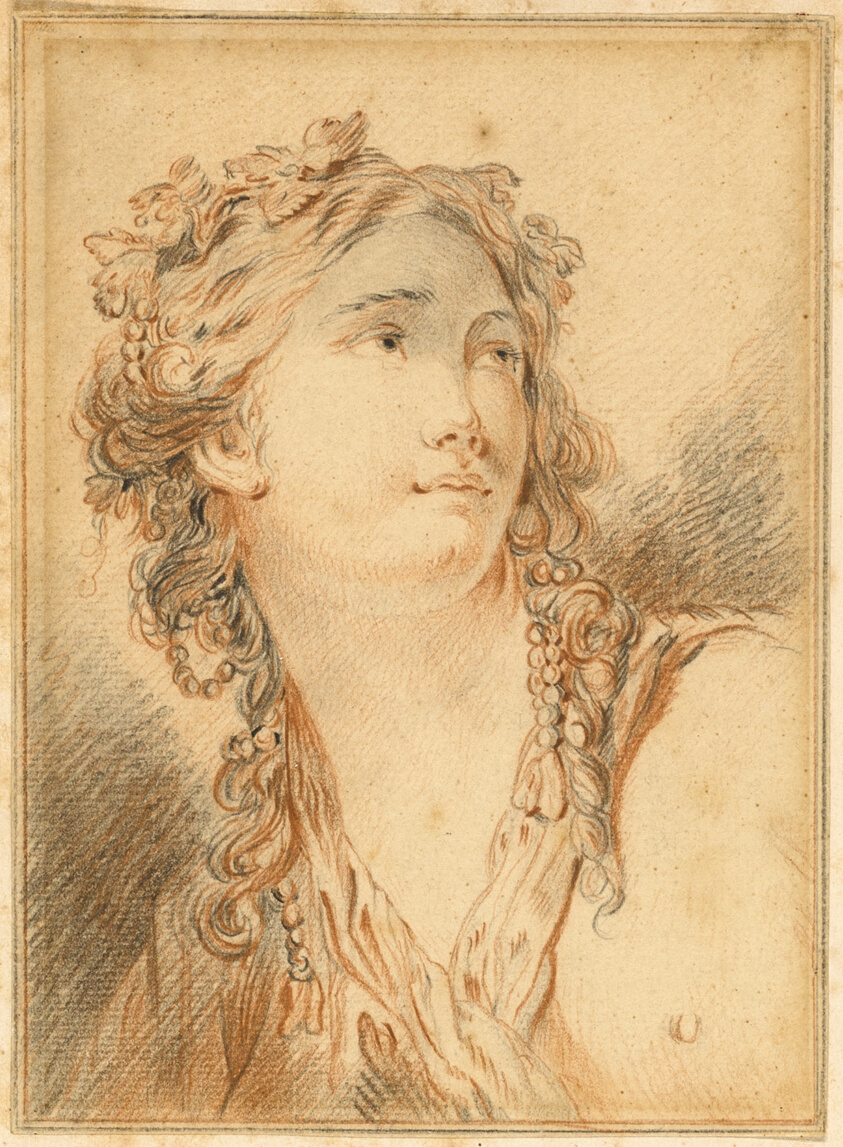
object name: Drawing and Watercolor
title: Head of Bacchante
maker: Attributed to François Boucher; French, 1703-1770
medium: Red chalk and black chalk, on cream laid paper, laid down on buff wove paper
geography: France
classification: chalk; drawings (visual works); prints and drawing